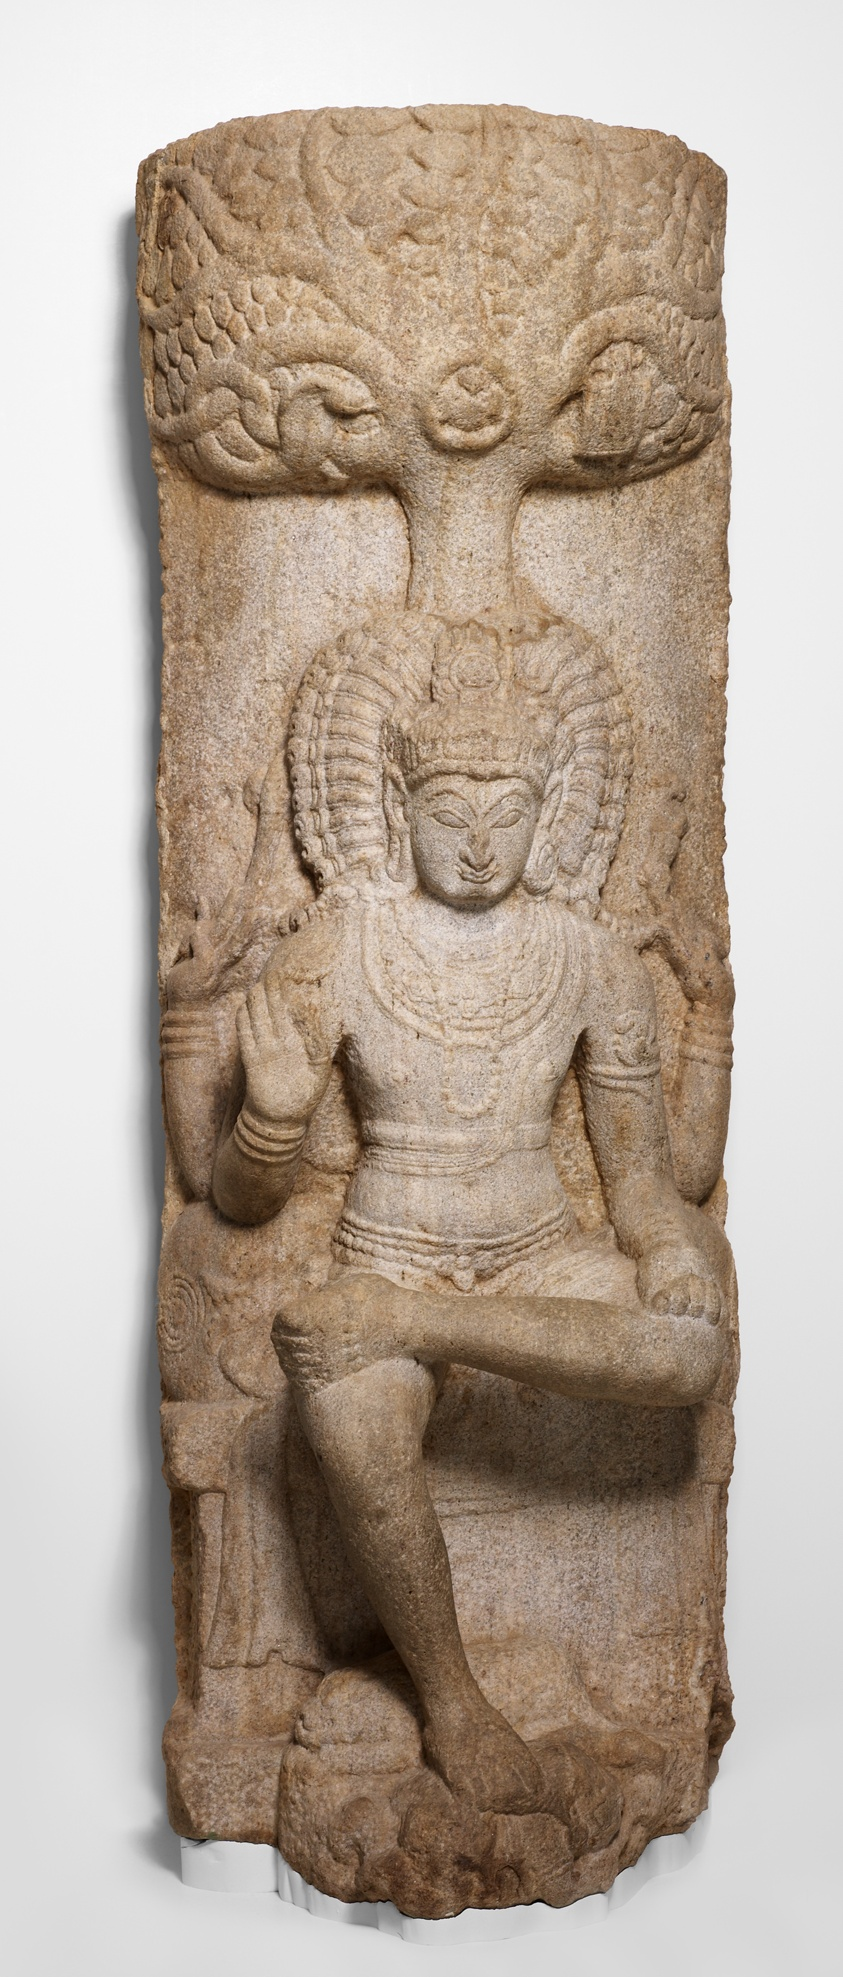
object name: Sculpture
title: God Shiva as the Supreme Teacher (Dakshinamurti)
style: South Asian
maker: India; Tamil Nadu, Kodumbalur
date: 10th century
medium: Granite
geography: Kodumbalur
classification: stone (unidentified); stone; sculpture; asian art